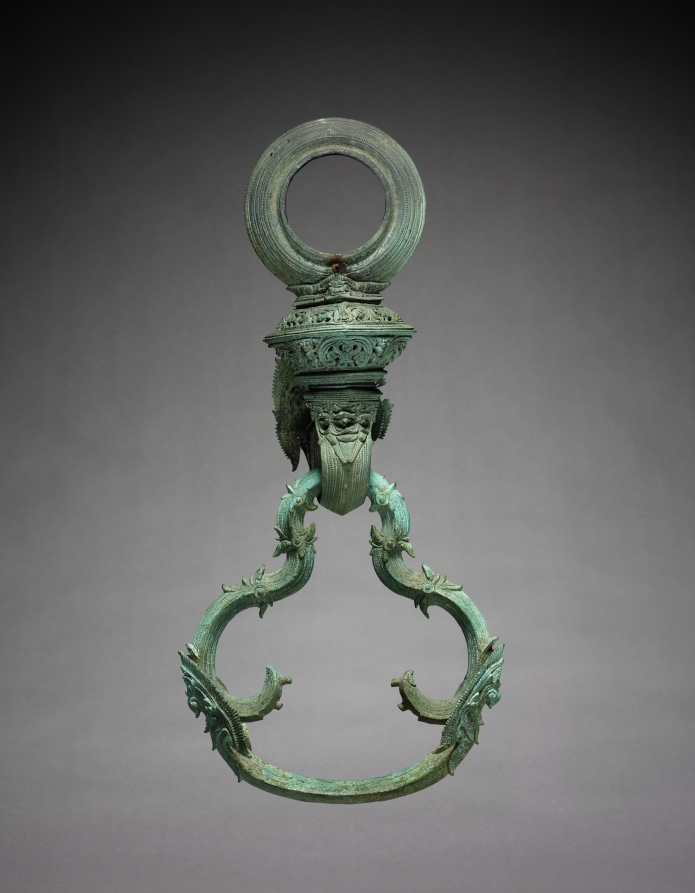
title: One of a Pair of Decorated Palanquin Hooks and Rings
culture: Cambodia, Angkor Wat Style, 12th century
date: 1100–1175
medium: bronze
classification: Sculpture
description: Hooks, suspension rings, and finials cast in bronze are very common fixtures in Cambodian decorative art. Frequently they served a practical function, such as the present set, used for a palanquin in which a person was carried from place to place. The litter or throne was fastened to the rings which in turn were suspended from the books fixed by bolts to transverse poles carried on the shoulders of the palanquin bearers. Chariots, palanquins, furniture, and harnesses were frequently embellished with various bronze decorations, finials, and fixtures. Those, as a rule, were gilded, making the objects they served look very sumptuous. The relief sculpture found on various Khmer monuments, such as Angkor Wat or Bayon, illustrates well the use and context of those bronze implements in ancient Cambodian life. These frequently elaborate bronze fixtures were decorated with motifs generally popular in Cambodian art: such as nagas, garudas, floral, or animal patterns. This pair of hooks and rings, unusually large in size, take on a naga form in the hooks. They are decorated with perforated floral and animal motifs done with great care and precision. The rings, suspended from hooks, are in the form of tri-fold flower stalks with naga motifs repeated at the end of the curved stalks. Such elaborate and huge hooks and rings must have no doubt decorated a palanquin of an important individual, possible a ruler himself. Their decoration is typical of the mature Angkor Wat style.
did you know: The naga, a water serpent with a multiheaded hood, is a Khmer national emblem.